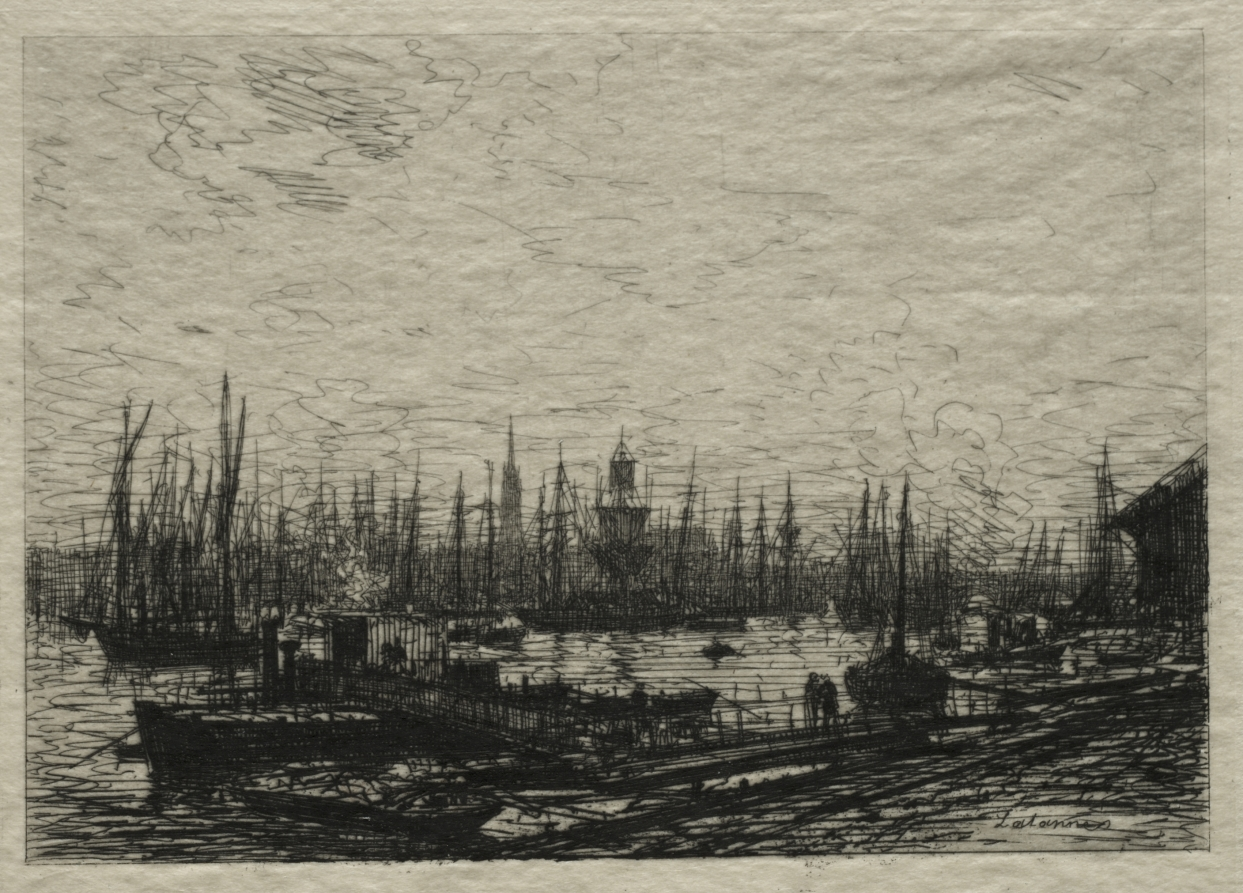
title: In the Bordeaux Harbor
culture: France, 19th century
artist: Maxime Lalanne (French, 1827–1886)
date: 1869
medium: etching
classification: Print